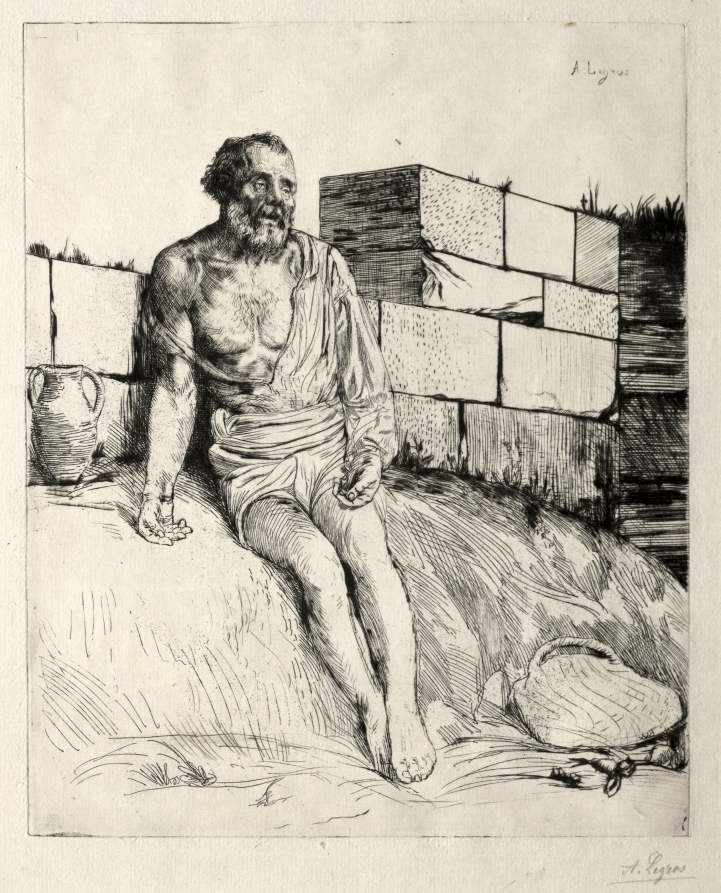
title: Job (First Plate)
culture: France, 19th century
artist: Alphonse Legros (French, 1837–1911)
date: c. 1857–1911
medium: etching and drypoint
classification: Print